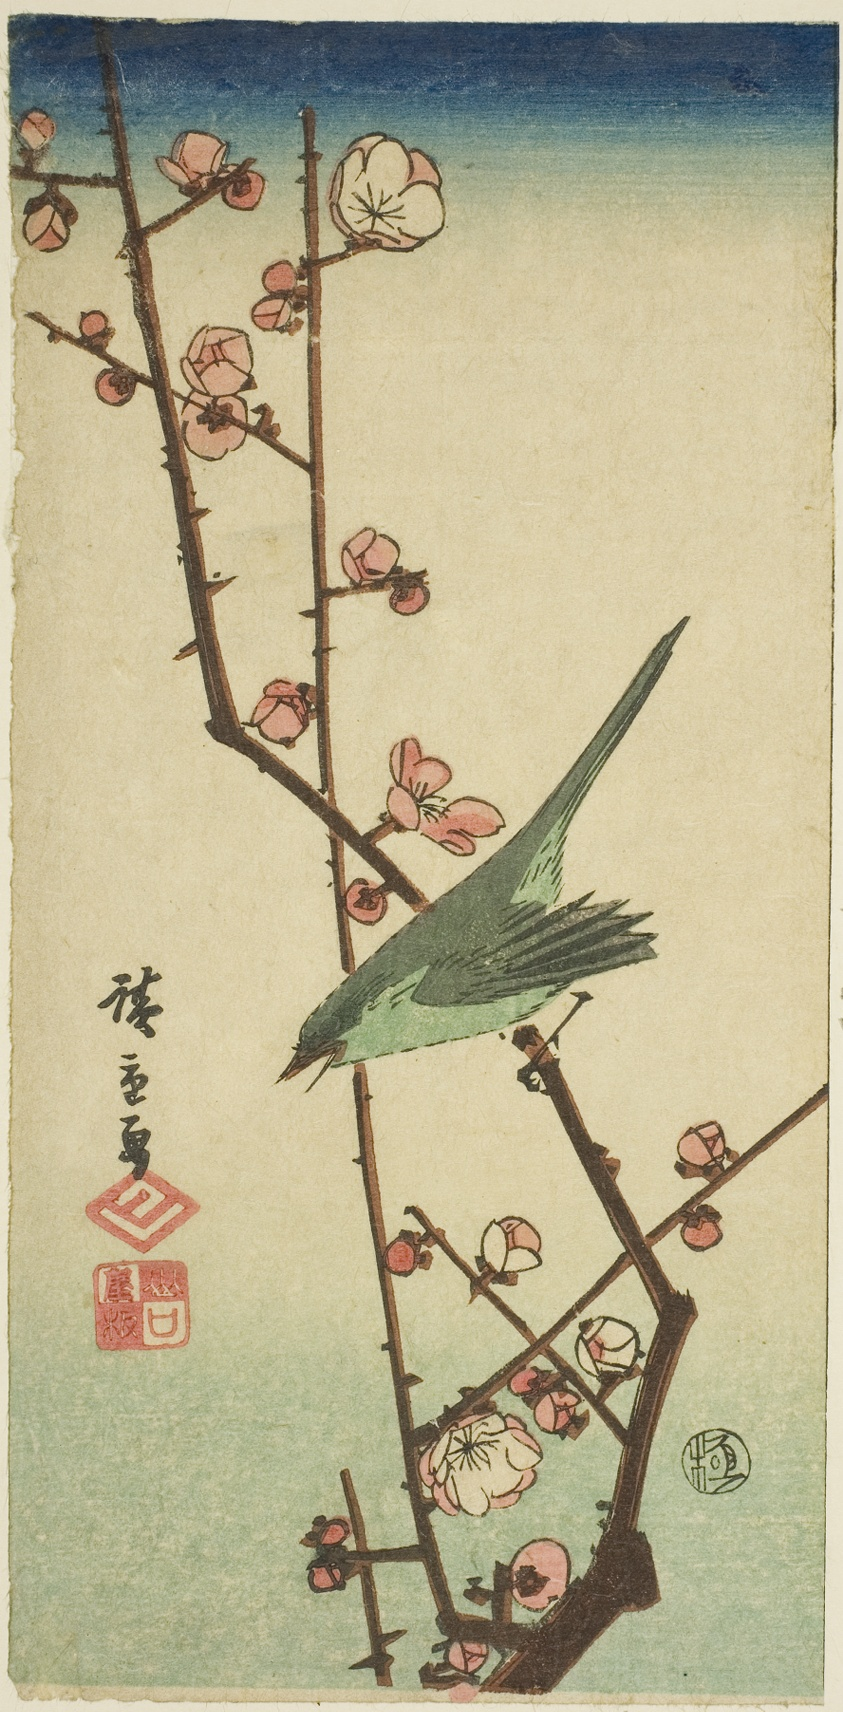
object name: Print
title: Warbler on plum branch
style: Japanese (culture or style)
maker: Utagawa Hiroshige 歌川 広重; Japanese, 1797-1858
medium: Color woodblock print; sanchogake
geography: Japan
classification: woodblock print; print; asian art